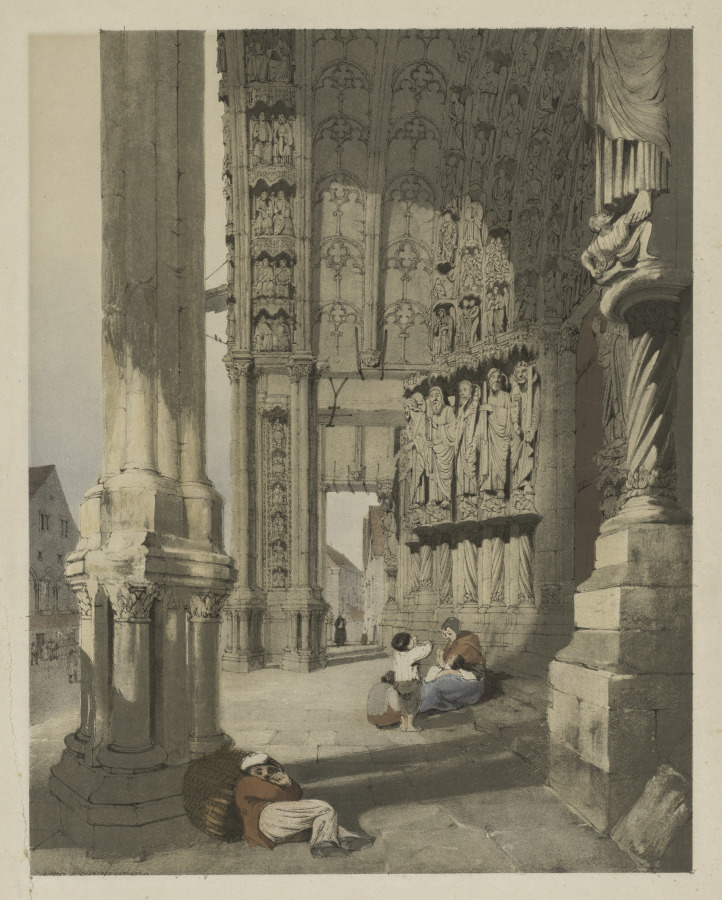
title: Picturesque Architecture in Paris, Ghent, Antwerp, Rouen, Etc.: South Porch of Chartres Cathedral,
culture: England, 19th century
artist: Thomas Shotter Boys (British, 1803–1874)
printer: C. Hullmandel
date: 1839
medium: color lithograph with hand coloring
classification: Print